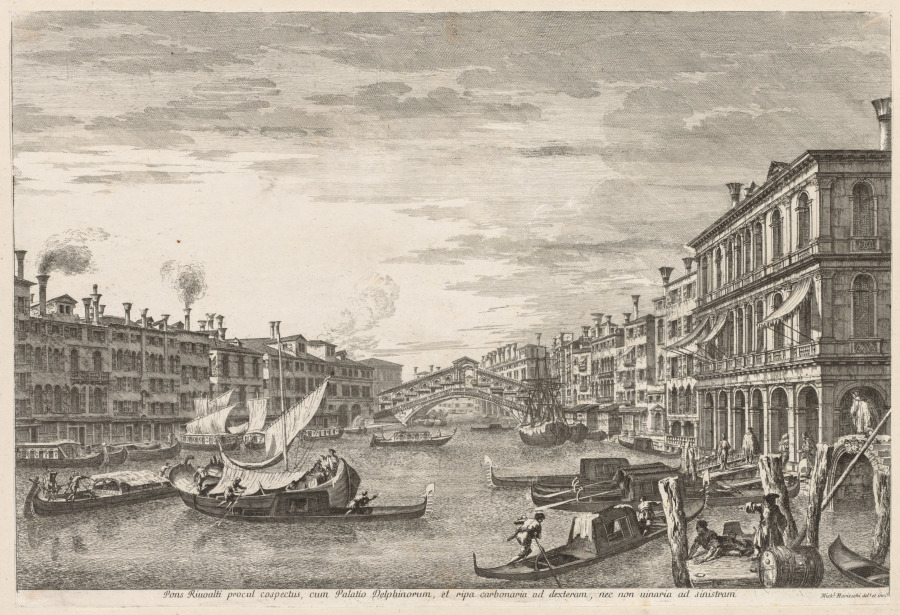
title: Views of Venice: Rialto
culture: Italy, 18th century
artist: Michele Marieschi (Italian, 1710–1743)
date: 1741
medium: etching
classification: Print